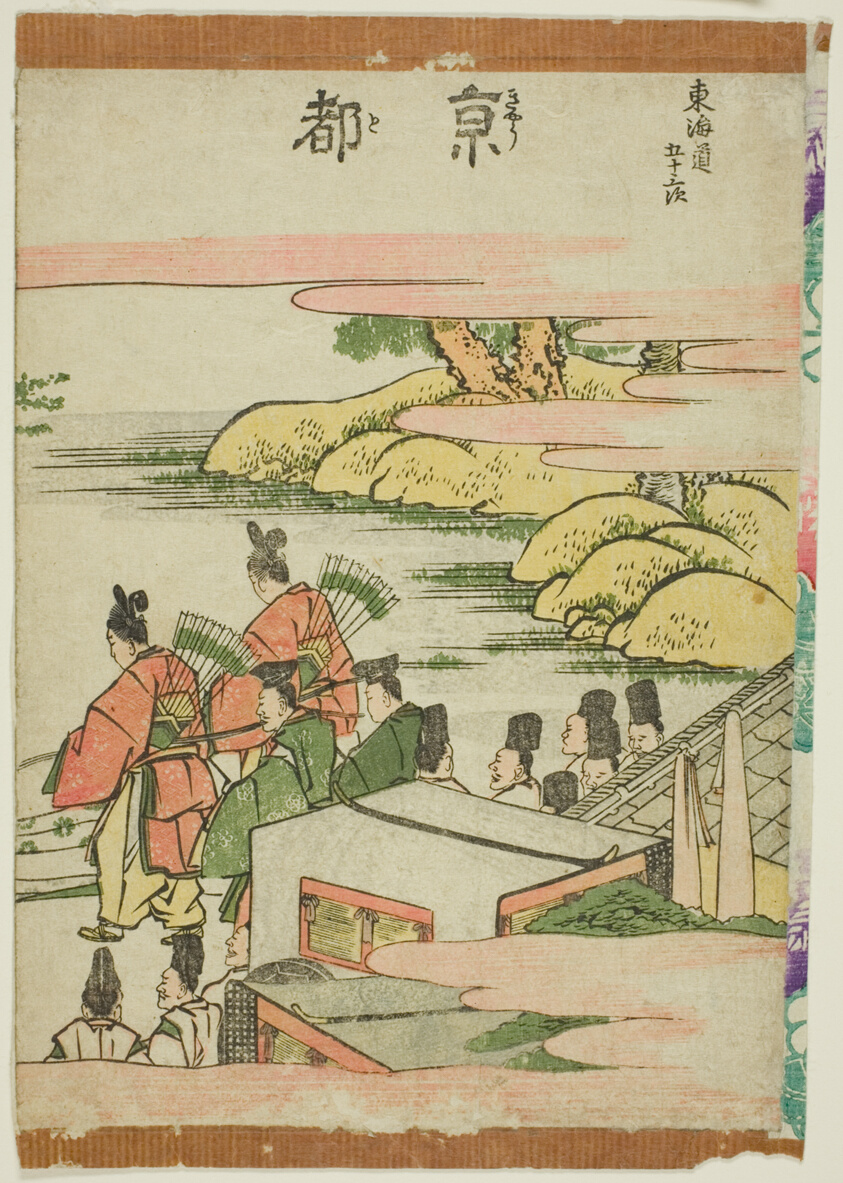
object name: Print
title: Kyoto, from the series "Fifty-three Stations of the Tokaido (Tokaido gojusan tsugi)"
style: Japanese (culture or style)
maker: Katsushika Hokusai 葛飾 北斎; Japanese, 1760-1849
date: c. 1806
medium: Color woodblock print; chuban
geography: Japan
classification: woodblock print; print; asian art